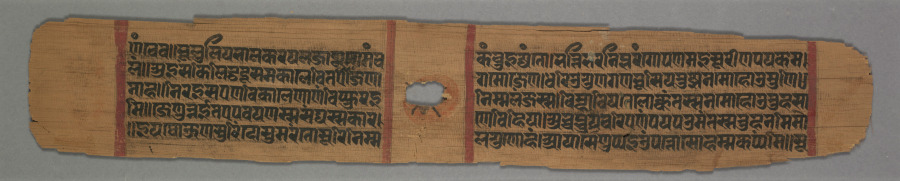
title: Folio 141 (recto), from a Kalpa-sutra and Story of Kalakacharya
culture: Western India, Gujarat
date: 1287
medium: gum tempera and ink on palm leaf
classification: Painting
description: Palm leaf was the preferred material for sacred texts before the 1400s in India. The text here was often appended to the Kalpa-sutra, the most sacred book of Jainism. This story concerns the life of a Jain teacher named Kalaka, a prince who developed the ability to work magic after he become a monk, inspired by the teachings of a holy man. The painting on this page shows a monk clad in white, indicating his affiliation with the Shvetambara (“white clad”) branch of Jainism. It is the second to the last page of the manuscript and includes the beginning of the colophon, which contains information about when and where this manuscript was produced.